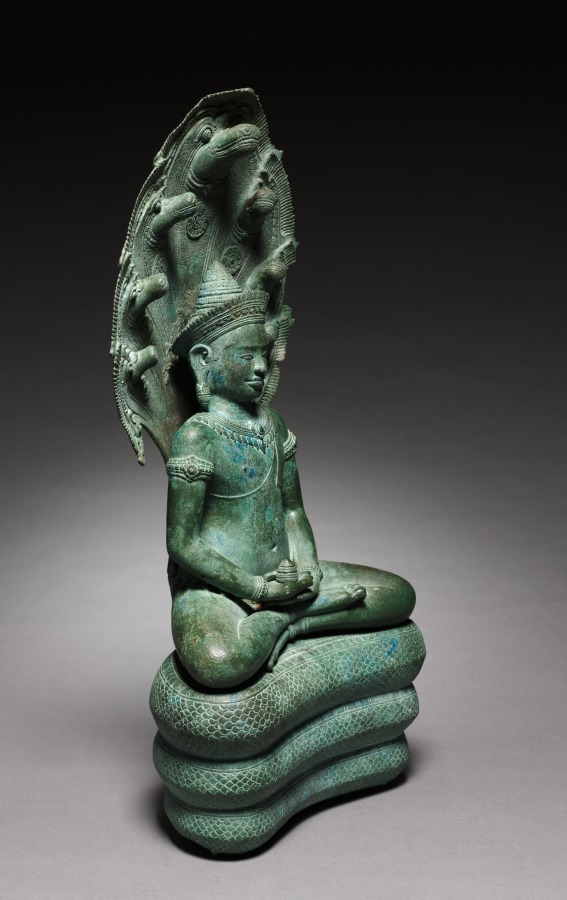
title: Naga-Enthroned Buddha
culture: Cambodia, Angkor, Angkor Wat Period, 12th century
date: 1100s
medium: bronze with traces of gilding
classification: Sculpture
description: Jayavarman VII, who built the great royal temple at Banteay Chhmar, linked himself with the image of the Buddha seated on a serpent, or naga, as the divine form under which he would be honored. During his reign, the naga-enthroned Buddha became a ubiquitous image for veneration, often set up together with Lokeshvara, who was associated with his father, and Prajnaparamita, the form under which his deceased mother was honored. Lokeshvara is the powerful enlightened being of compassion, while Prajnaparmita is the goddess who personifies wisdom. King Jayavarman VII, therefore, presented himself as the enlightened Buddha, the product of the union of Compassion and Wisdom, supported and glorified by the naga, which refers to the Khmer people. Images of the naga-enthroned Buddha have been found at Banteay Chhmar, both in architectural relief sculpture and as icons in the round. After the death of Jayavarman VII, followers of other forms of Buddhism (for example, Theravada) that became prevalent in Cambodia changed the meaning of the naga-enthroned Buddha and reinterpreted the image to refer to a scene from the historical Buddha’s life story in which a serpent protected him from a flood. The crowned and bejeweled aspect of this Buddha, though, indicates that it is another kind of transcendent figure. In his lap his hands are in a posture of meditation, holding what appears to be an offering of ceremonial rice referring to the hope that he will ensure the prosperity of the land.